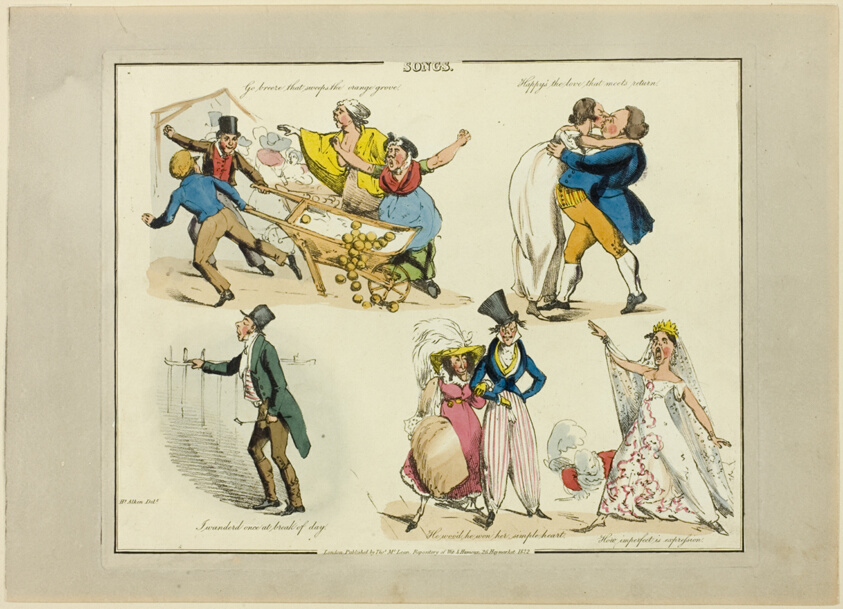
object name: Print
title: Plate from Illustrations to Popular Songs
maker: Henry Alken (English, 1785-1851); published by Thomas McLean (English, active 1790-1860)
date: 1822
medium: Soft ground etching with hand-coloring and aquatint on paper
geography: England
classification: etching; print; prints and drawing